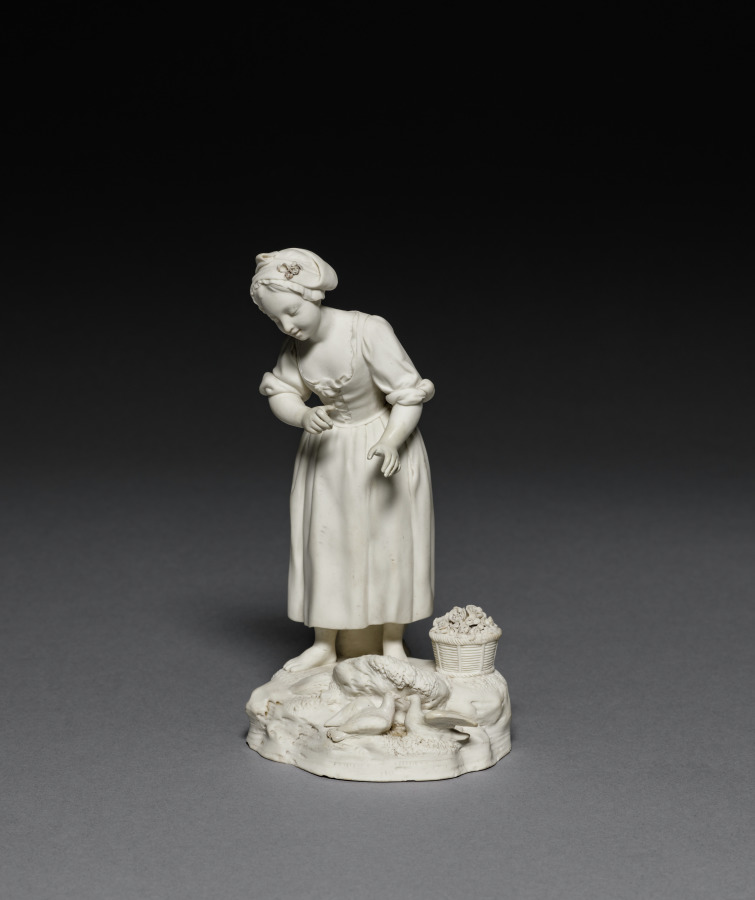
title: Curiosity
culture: France, Lunéville, 18th century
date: c. 1770–1775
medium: pipe clay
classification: Ceramic